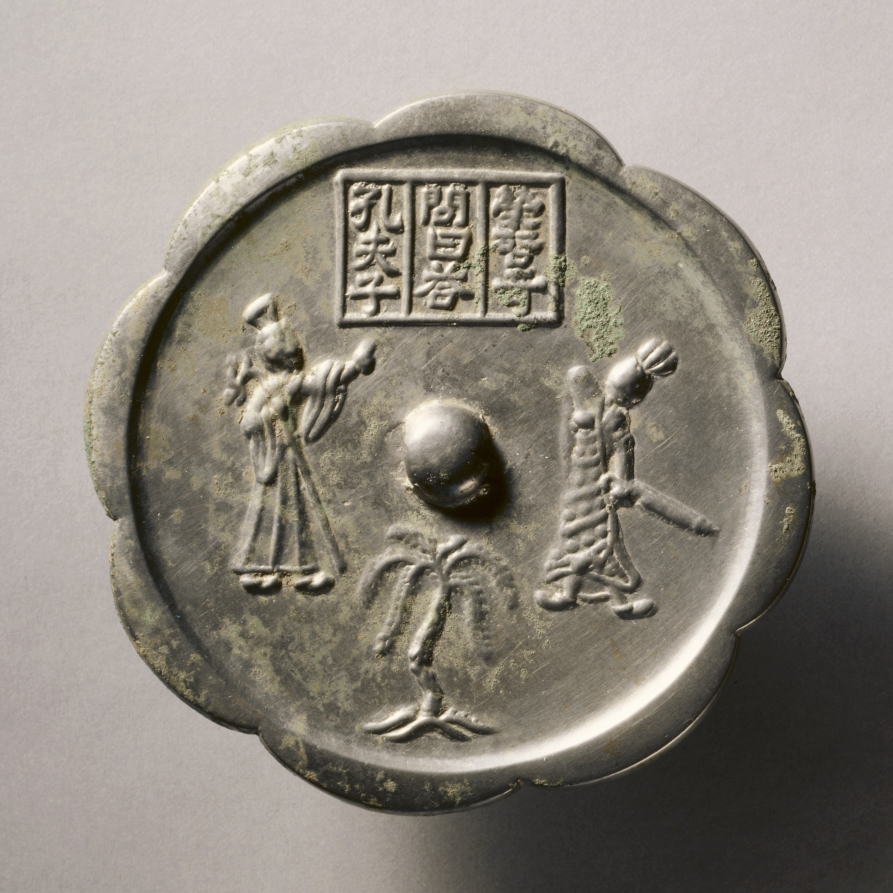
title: Lobed Mirror of Three Delights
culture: China, Tang dynasty (618-907)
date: 700s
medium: bronze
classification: Metalwork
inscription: 榮啟期問曰答孔夫子